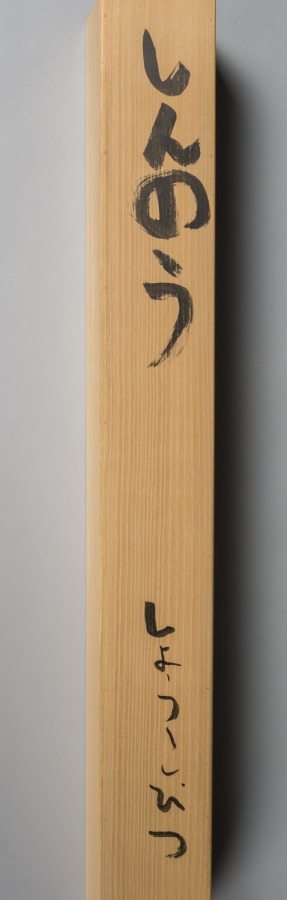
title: Shennong (Shinnō)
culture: Japan, Muromachi period (1392–1573)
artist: Shōryō (Japanese)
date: late 1400s–early 1500s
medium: hanging scroll; ink on paper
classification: Painting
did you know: Shennong legendarily taught people how to farm and also how to use plants as medicine.